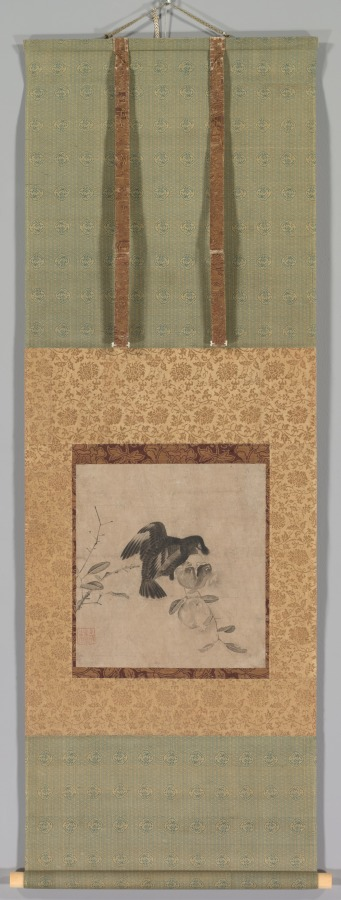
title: Crow on a Pomegranate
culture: Japan, Muromachi period (1392–1573)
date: 1500s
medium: hanging scroll; ink on paper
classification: Painting